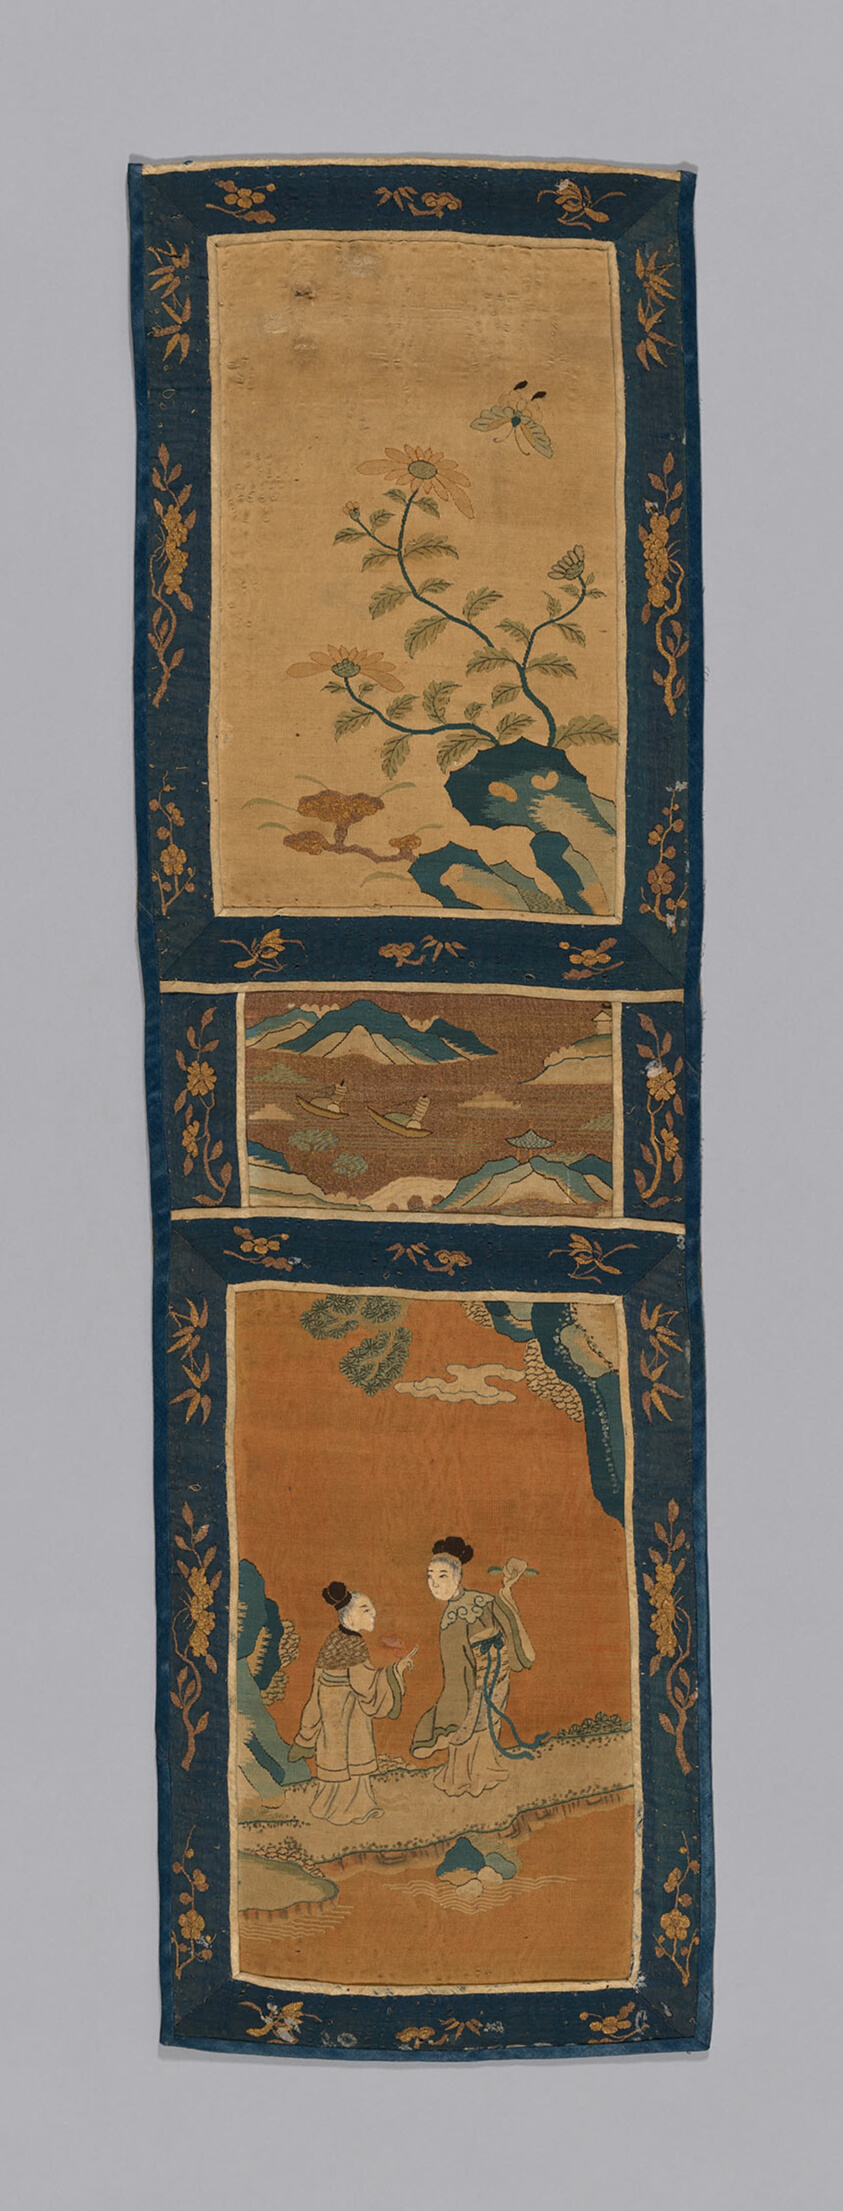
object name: Textile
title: Panel (For a Screen)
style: qing, Chinese (culture or style), East Asian, asian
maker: China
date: Qing dynasty (1644–1911), 1875/1900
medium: Panels: silk, gold-leaf-over-lacquered-paper-strip-wrapped silk, silt tapestry weave; painted; border: silk, gold-leaf-over-lacquered-paper-strip-wrapped silk, slit tapestry weave; inner and outer border: silk, 4:1 warp-float satin weave; outer edging: silk, 7:1 warp-float faced satin weave; lining: cotton, plain weave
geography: China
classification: textile; weaving